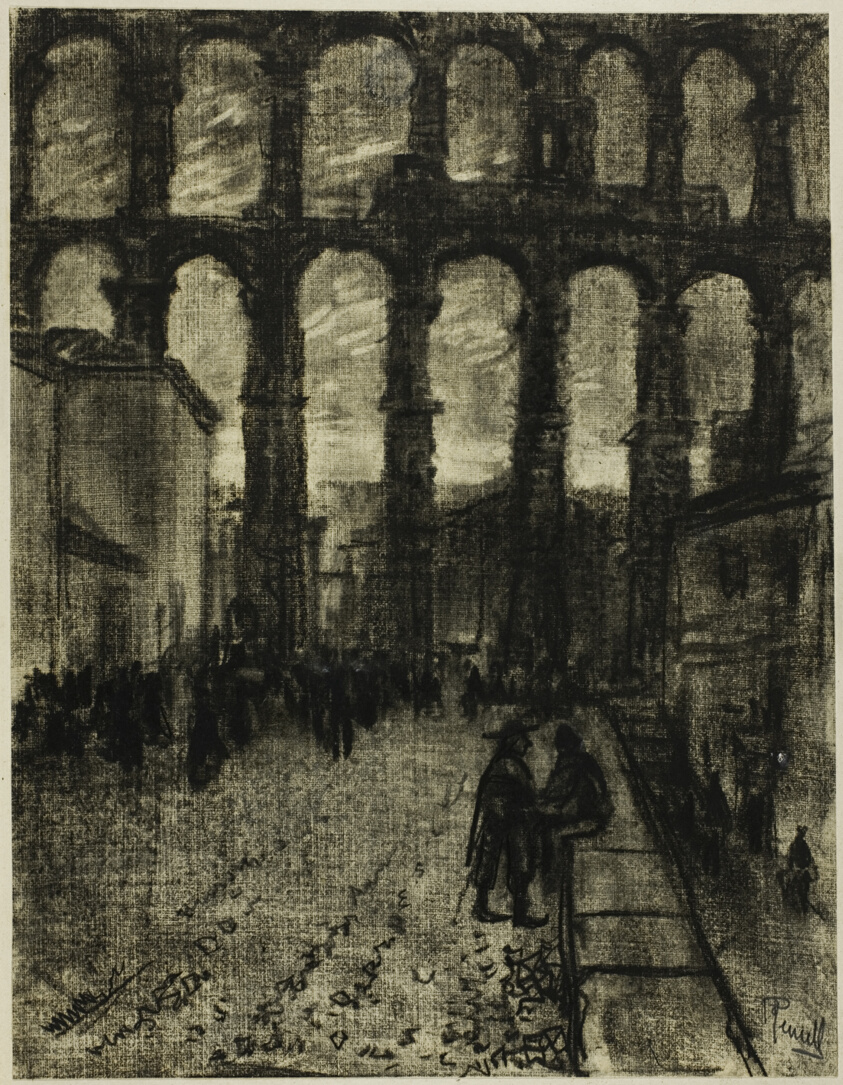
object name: Drawing and Watercolor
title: Segovia, The Aqueduct from Market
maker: Joseph Pennell (American, 1857-1926)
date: c. 1903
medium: Oiled charcoal with stumping and erasing, with traces of white chalk, on cream wove paper, perimeter mounted on off-white wood pulp laminate board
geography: United States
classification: charcoal; drawings (visual works); prints and drawing